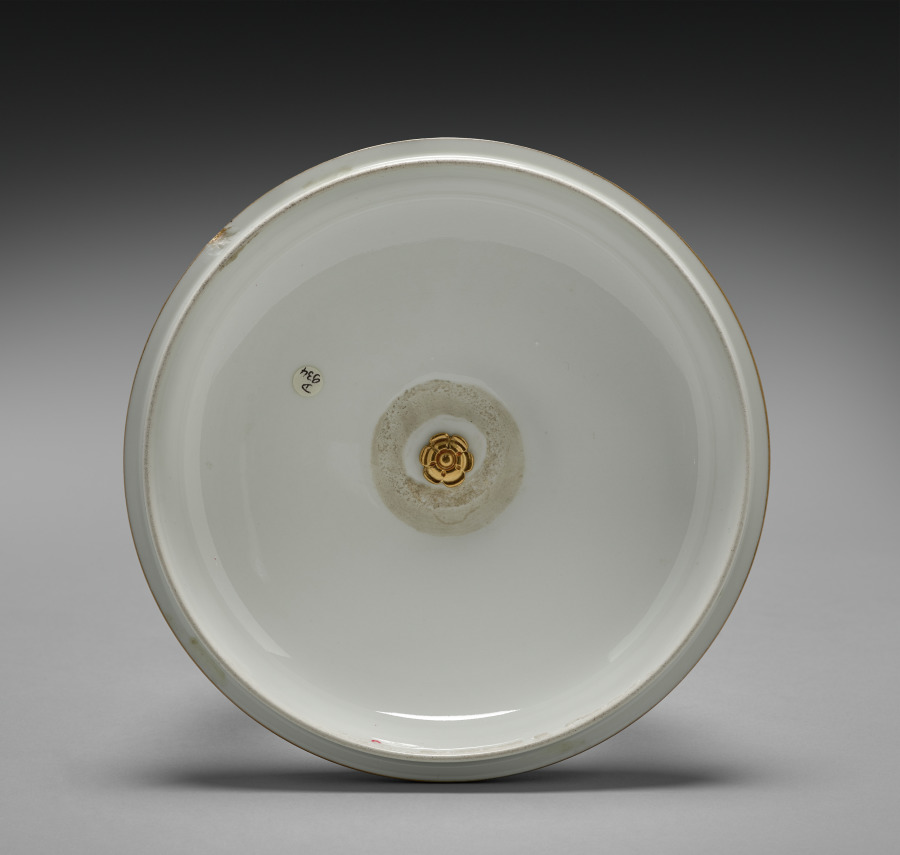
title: Vase, Feuille d'Eau (lid)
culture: France, Sèvres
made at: Sèvres Porcelain Factory (French, est. 1756)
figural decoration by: Paul Marie Roussel (French, 1804–1877)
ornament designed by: Emile Renard (French)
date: 1858–62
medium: porcelain with gilt bronze mounts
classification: Ceramic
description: Feuille d'Eau means "waterleaf" and refers to the name given to the shape of this vase at the Sèvres factory. In English, waterleaf is the common name for a plant with bell-shaped flowers. The term is also applied to a stylized plant motif used in Graeco-Roman ornament. This vase was exhibited by the Sèvres firm at the International Exhibition held in London in 1862.